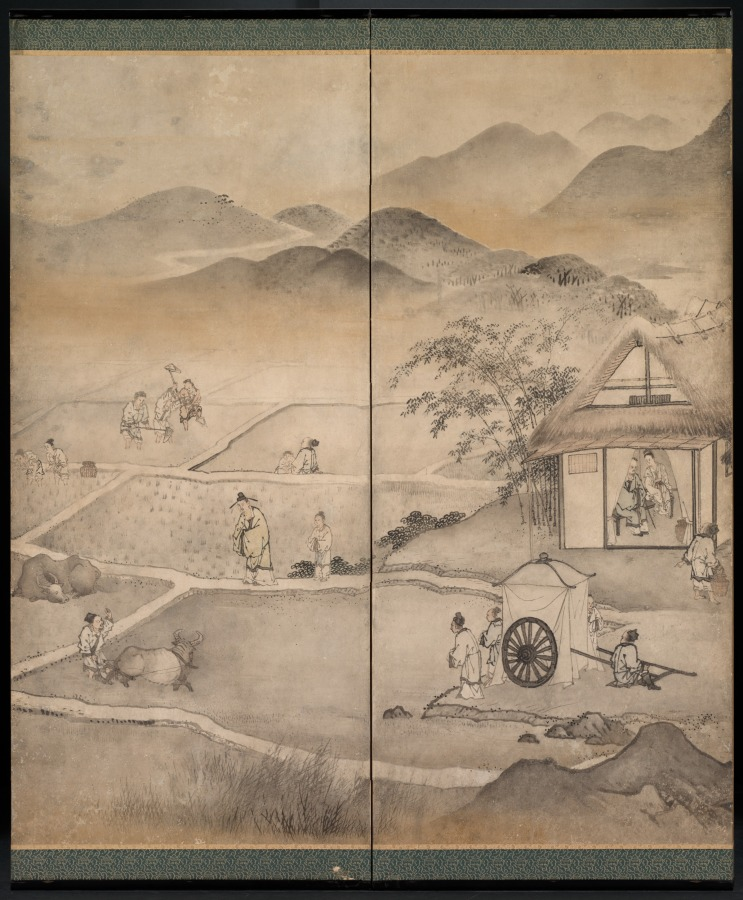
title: Emperor Yao Visiting Yu Chonghua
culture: Japan, Edo period (1615–1868)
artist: Kusumi Morikage (Japanese, active c. 1620–1690)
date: mid- to late 1600s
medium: One of a pair of six-panel folding screens, ink, slight color, and gold on paper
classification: Painting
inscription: signature and seal at lower right.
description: One of a pair, this screen shows a section of the narrative of how the Chinese Emperor Yao (about 2356–2255 BC) selected his successor, Yu Chonghua (about 2294– 2184 BC), who would become Emperor Shun. The artist who painted this screen, Kusumi Morikage, trained with Kano Tan’yō (1602–1647), painter-in-residence to Japan’s shogun, the country’s ruler, and was one of his four top students. Despite the conservative subject matter, Morikage’s distinctive sensibility shines through in his playful treatment of the gray and white elephants in the far left panel of the composition. According to legend, Chonghua was so virtuous that in the spring, elephants bounded down from the mountains to help him till the soil with their tusks.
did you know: The emperor's two-wheeled carriage sits in front of a thatched-roof farmhouse.